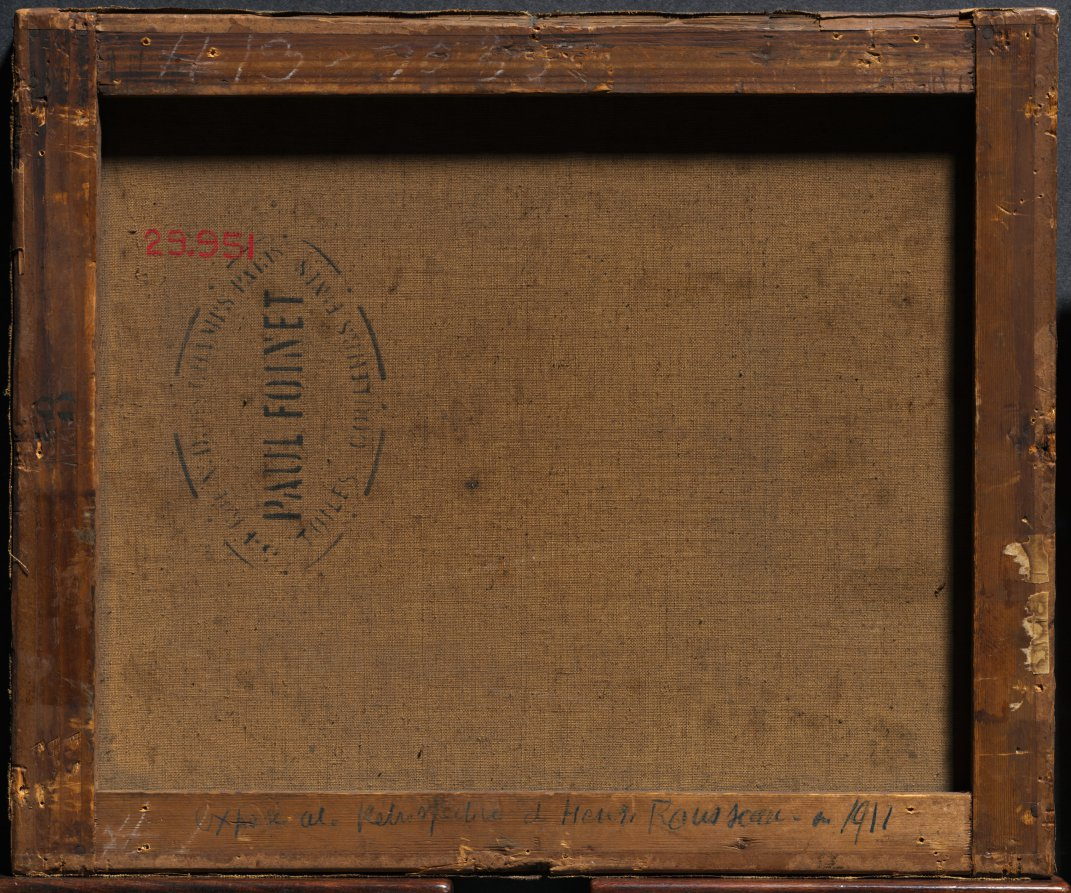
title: Outskirts of Paris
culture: France, late 19th Century-early 20th Century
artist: Henri Rousseau (French, 1844–1910)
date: c. 1897–1905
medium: oil on fabric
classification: Painting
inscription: Signed lower right: Henri Rousseau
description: In addition to his large jungle scenes, Rousseau also painted small landscapes, including this view of a river or canal on the outskirts of Paris. While retaining a sharp, detailed rendering of objects, Rousseau has abandoned the flat tonality of his earlier works for more blended modeling and freer brushwork. The volumes of the clouds, trees, and houses occupy distinct areas in space, revealing the serenity of an organized world. A self-taught painter who, at the age of 41, quit his job in the Paris municipal toll or tax service to devote himself entirely to art, Rousseau was widely admired by avant-garde artists for his intuitive sense of design and inventive subjects.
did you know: Rousseau once said to Picasso: "We are the two greatest artists of this era, you in the Egyptian style, I in the modern style."